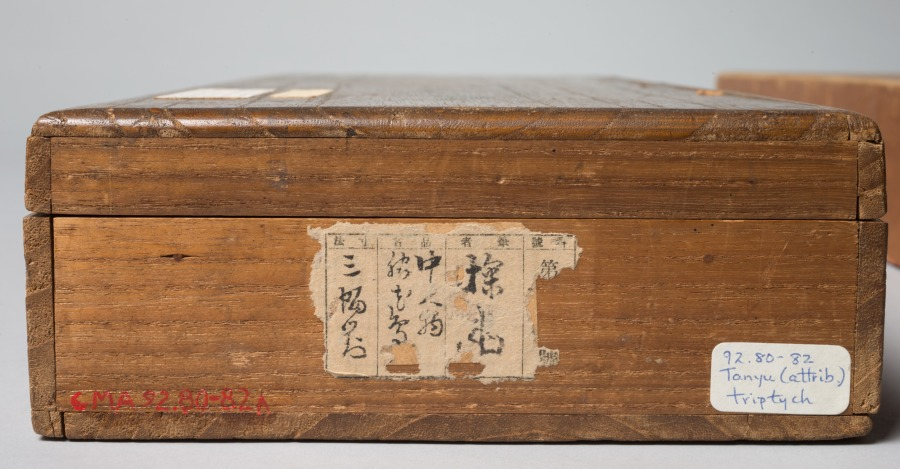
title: Sparrows on Blossoming Plum; A Sage with Tiger; Chinese Bird on Snow-Laden Branch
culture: Japan, Edo period (1615–1868)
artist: Kano Tan’yū (Japanese, 1602–1674)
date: 1661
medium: Triptych of hanging scrolls; ink and slight color on silk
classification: Painting